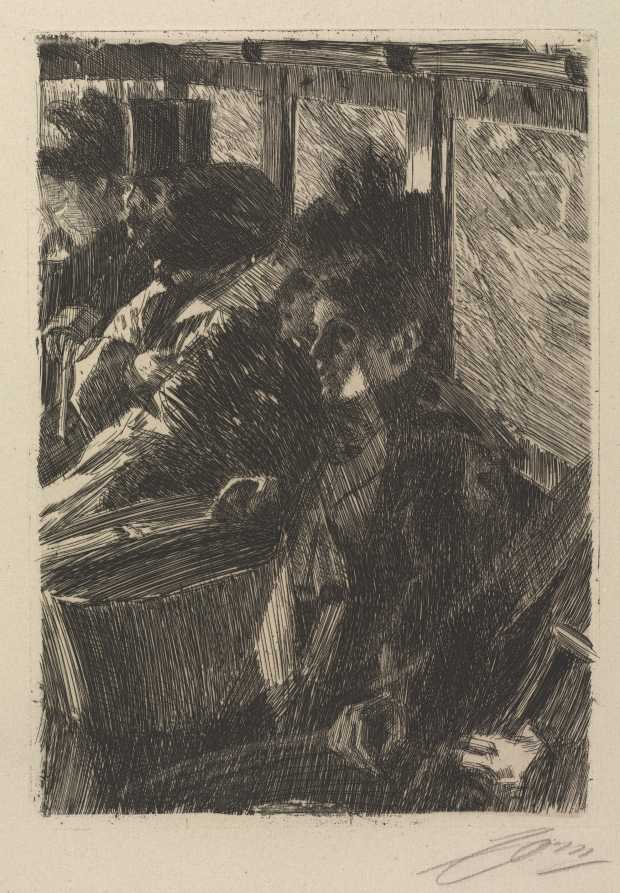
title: Omnibus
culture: Sweden, 19th century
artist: Anders Zorn (Swedish, 1860–1920)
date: 1892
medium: etching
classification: Print